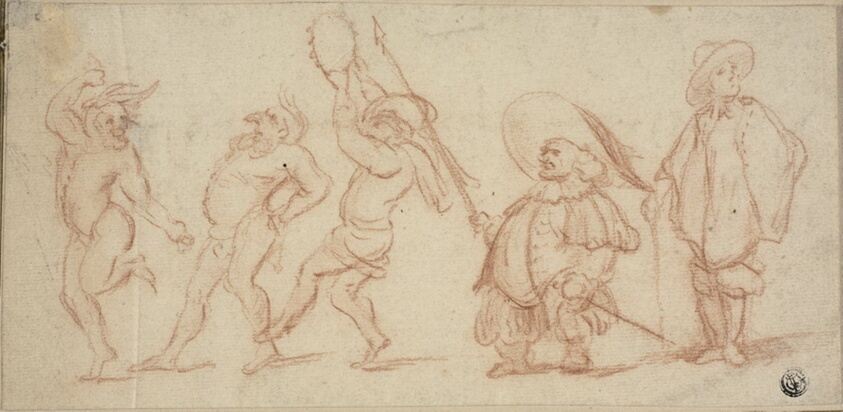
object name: Drawing and Watercolor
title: Carnival Figures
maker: Baccio del Bianco (Italian, 1604-1656)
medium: Red chalk on ivory laid paper, tipped onto tan wove paper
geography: Italy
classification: chalk; drawings (visual works); prints and drawing